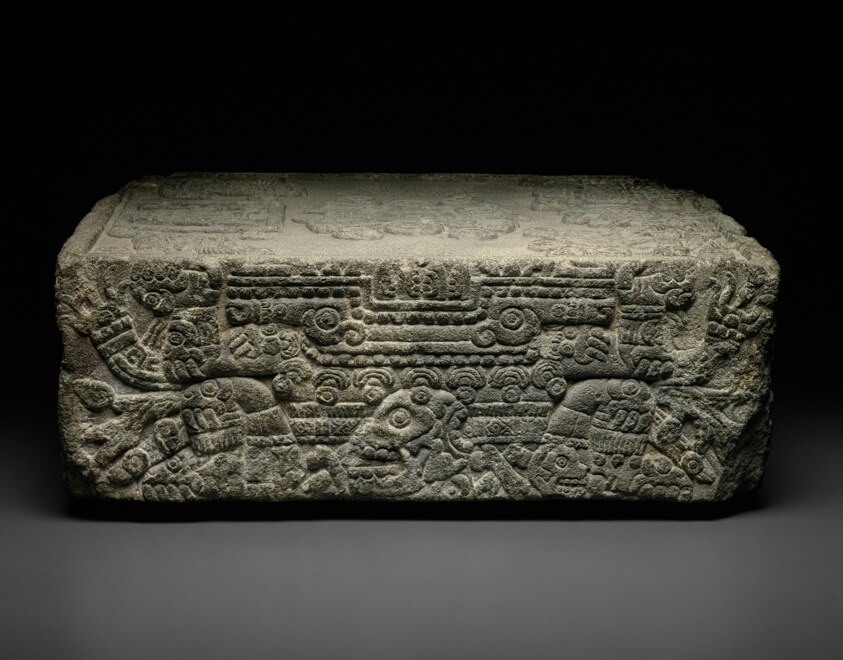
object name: Sculpture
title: Coronation Stone of Motecuhzoma II (Stone of the Five Suns)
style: aztec, mesoamerican, Pre-Columbian, americas, Arts of the Americas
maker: Aztec (Mexica) (Tenochtitlan, Mexico)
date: 1503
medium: Basalt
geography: Tenochtitlan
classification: ceremonial object; stone; art of the americas; sculpture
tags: architecture, history, coronations, animals, record of events, Hieroglyphs, Mexico, Aztecs, mythology, kingship, rulers (people), goddesses